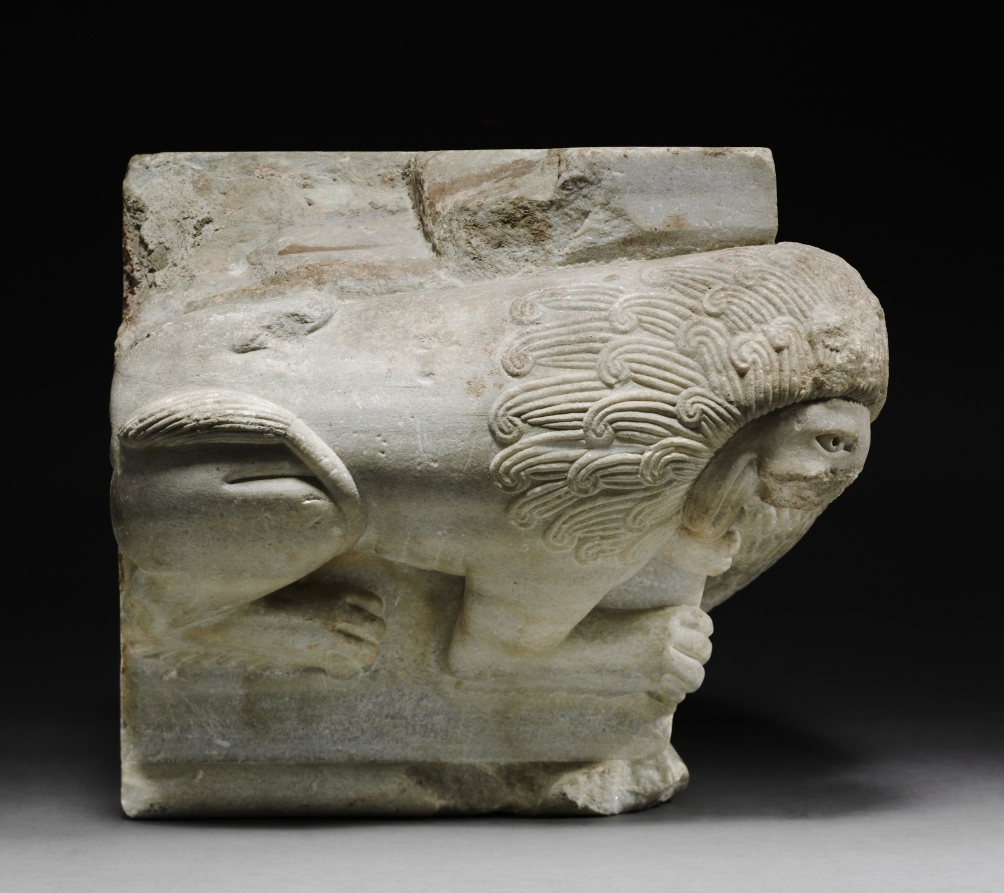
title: Engaged Capital with a Lion and a Basilisk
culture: Northern Italy, Emilia (Bologna?), 12th century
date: 1175–1200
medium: marble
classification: Sculpture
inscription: BASILISC.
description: The basilisk is an imaginary animal, half cock and half snake. According to medieval bestiaries, the basilisk could kill merely by its glance. It was commonly held as the symbol of the devil to be trodden down by Christ, first at the moment of his incarnation and then again during the Last Judgment.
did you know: This capital depicts a struggle between the good lion and the evil basilisk, a legendary reptile from myth. While the artist would not have encountered the mythical serpent, it is likely he never saw a real lion either based on its cartoonish appearance in this sculpture.